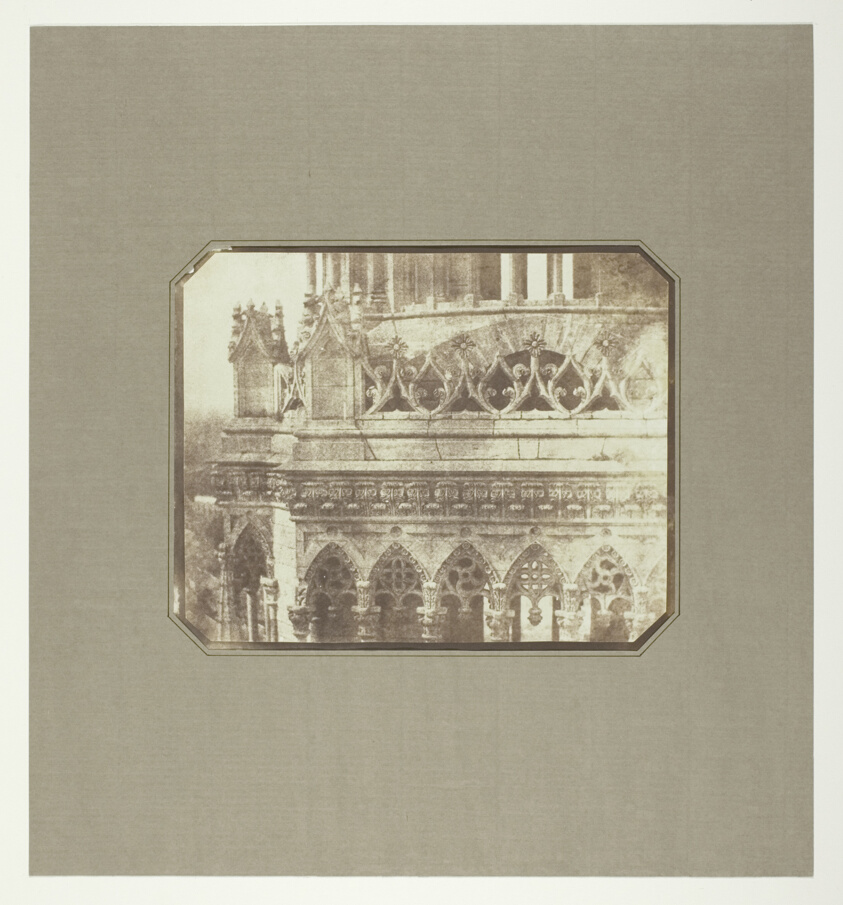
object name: Photograph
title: "One of the Towers of Orleans Cathedral, as Seen from the Opposite Tower"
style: 19th century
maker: William Henry Fox Talbot (English, 1800–1877)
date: June 21, 1843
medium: Salted paper print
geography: England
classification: salted paper print; photographic process; photography; photograph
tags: Collected by Hugh Edwards